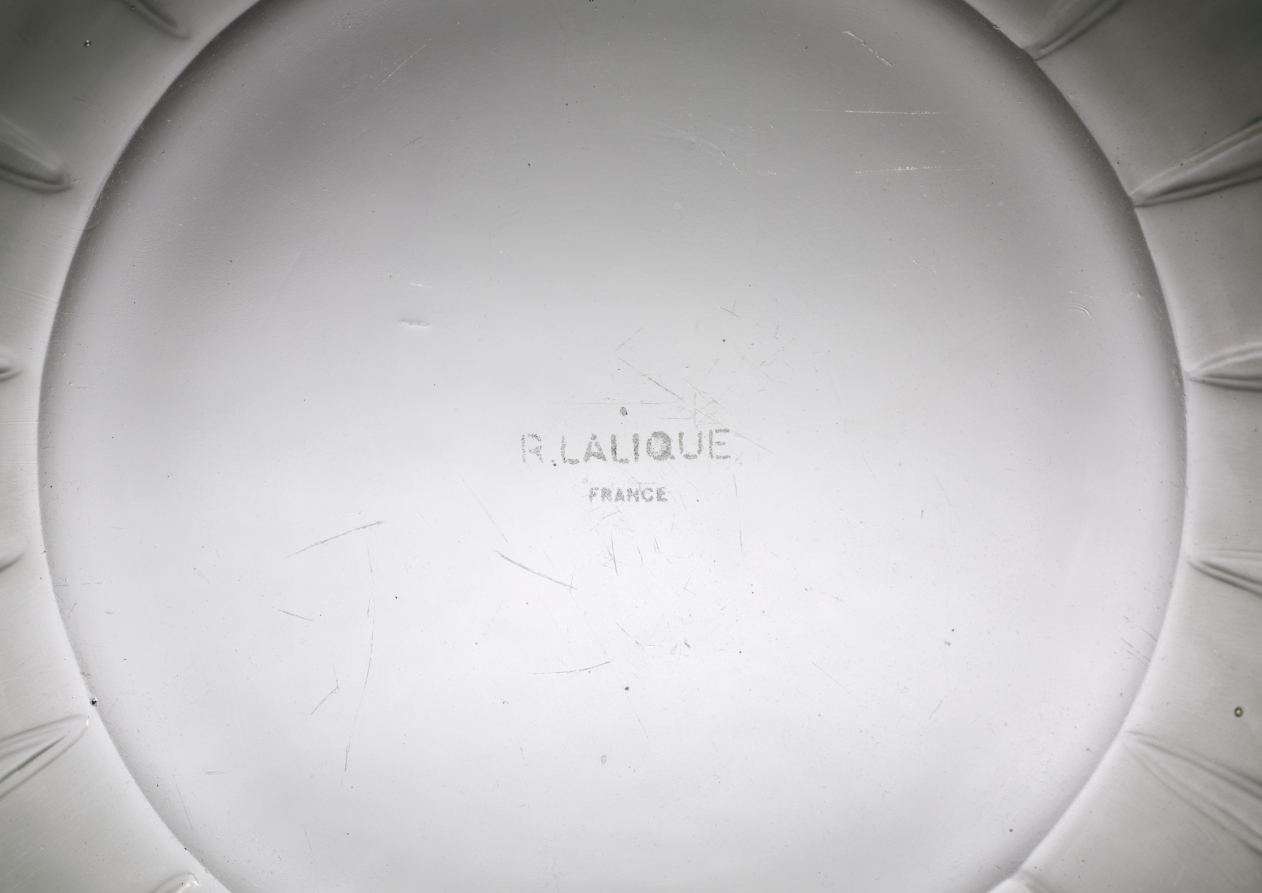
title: Parakeets (Perruches) Bowl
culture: France, 20th century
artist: René Lalique (French, 1860–1945)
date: 1931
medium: glass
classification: Glass